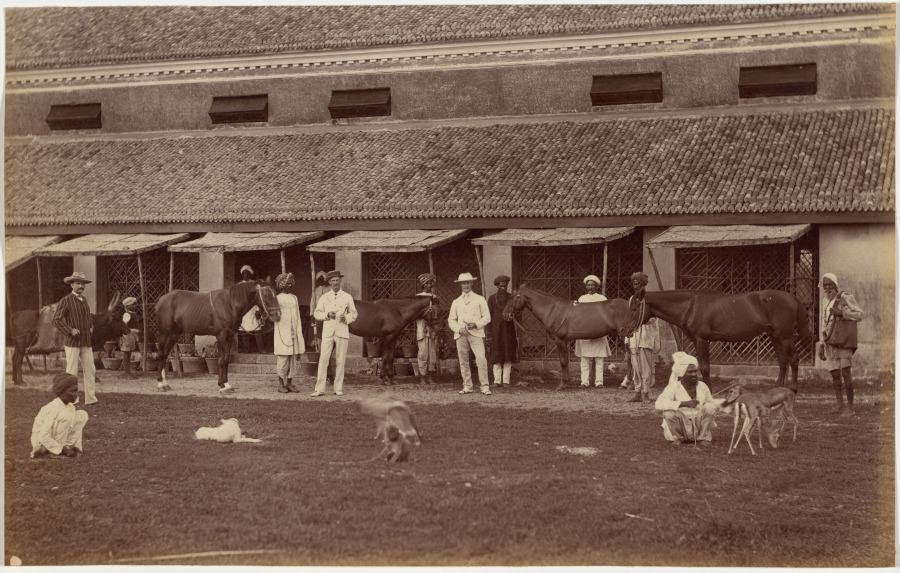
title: Major Sparks, Indore, July 86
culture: India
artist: Raja Deen Dayal (Indian, 1844–1905)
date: 1886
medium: albumen print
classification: Photograph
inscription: No visible inscriptions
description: Imported into India in great numbers by the British, horses were used for both transportation and sports such as riding, polo, and racing. Caring for the animals fell largely to Indian servants. Captions on the photographs’ mounts specify the owners of these animals (note that Major Sparks also has a monkey and pet deer). However, none of the Indian servants is identified. Nor would they have received a copy of the photograph because of their low social status, which was far below that of Deen Dayal.